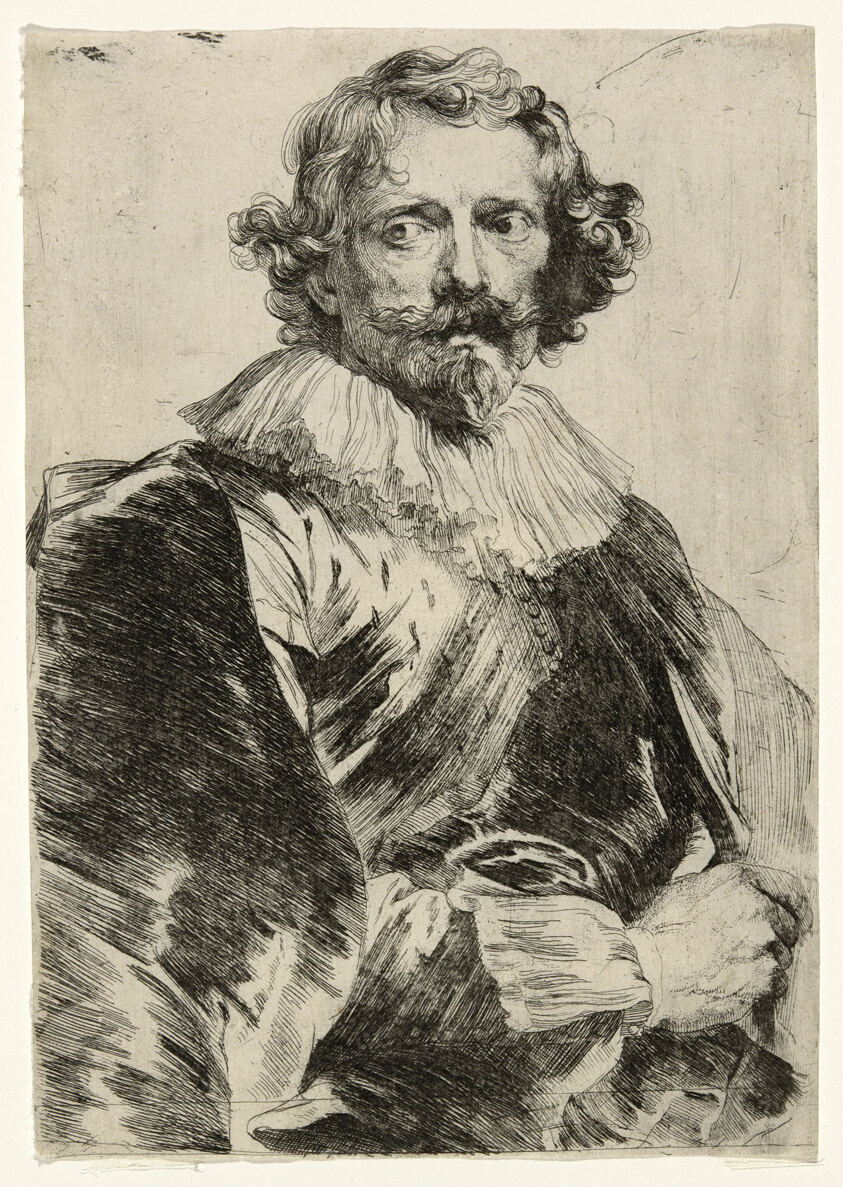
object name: Print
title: Lucas Vorsterman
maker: Anthony van Dyck (Flemish, 1599-1641)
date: 1630/33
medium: Etching in black on ivory laid paper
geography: Flanders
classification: etching; print; prints and drawing